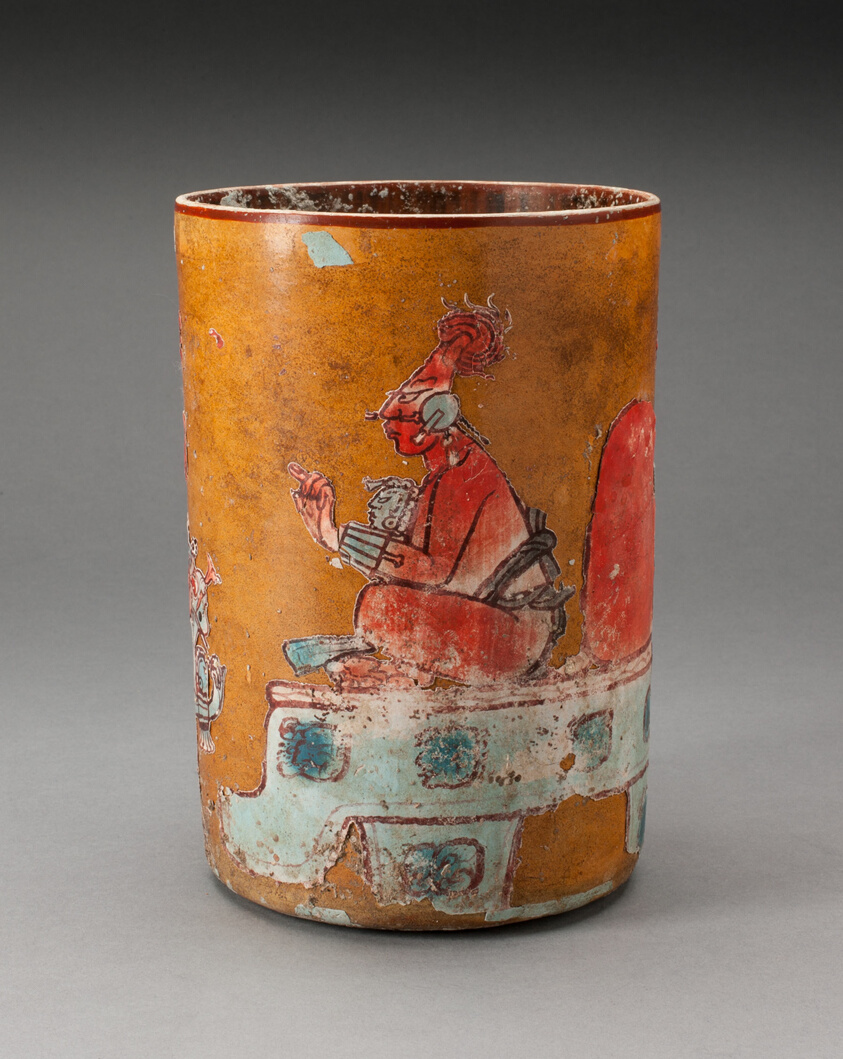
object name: Vessel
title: Vase Depicting a Courtly Scene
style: maya, mayan, americas, Arts of the Americas, mesoamerican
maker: Late Classic Maya; Petén region, Guatemala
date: 600–800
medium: Earthenware, slip, stucco, and pigment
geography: Guatemala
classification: earthenware; art of the americas; ceramics; vessel